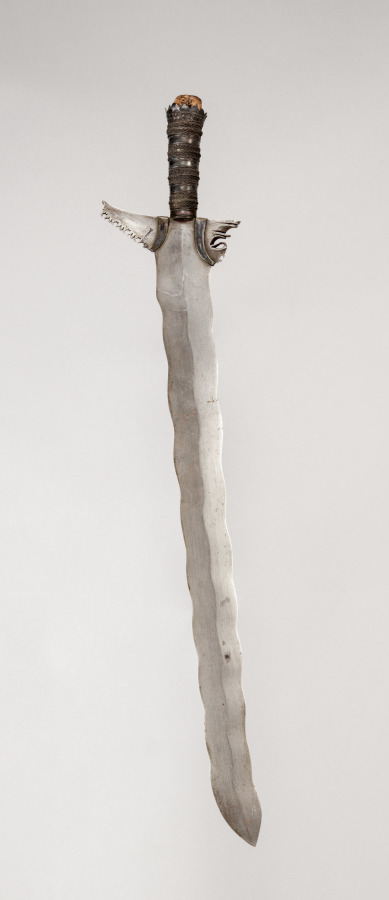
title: Sword (Kalis or Sundang)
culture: Philippines, Mindanao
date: before 1916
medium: Blade: metal; handle: metal with silver wire; pommel: silver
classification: Arms and Armor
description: The kalis is one of the most recognizable bladed weapons of Muslim Mindanao and the Sulu Archipelago and was both a weapon and a symbol of rank and honor. This long, double-edged steel blade features continuous undulations from base to tip. Among the Maranao and Maguindanao people, sword making was a specialized craft requiring collaboration among blacksmiths (panday), carvers, and metalsmiths.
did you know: The undulating blade is thought to embody spiritual potency and the dynamic flow of energy.